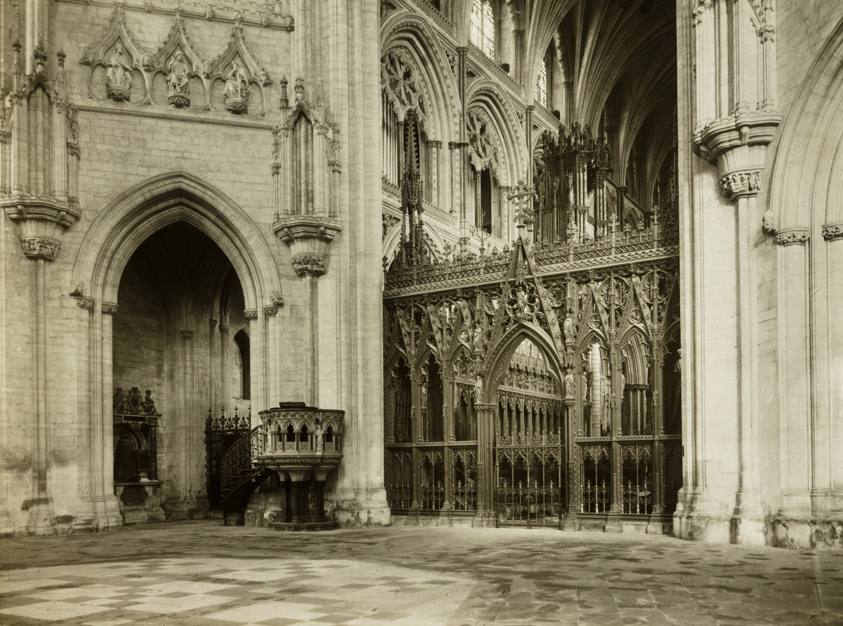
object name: Photograph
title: Ely Cathedral: Octagon into Choir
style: Pictorialism, 19th century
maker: Frederick H. Evans (English, 1853–1943)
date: c. 1891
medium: Lantern slide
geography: England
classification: photograph; photography